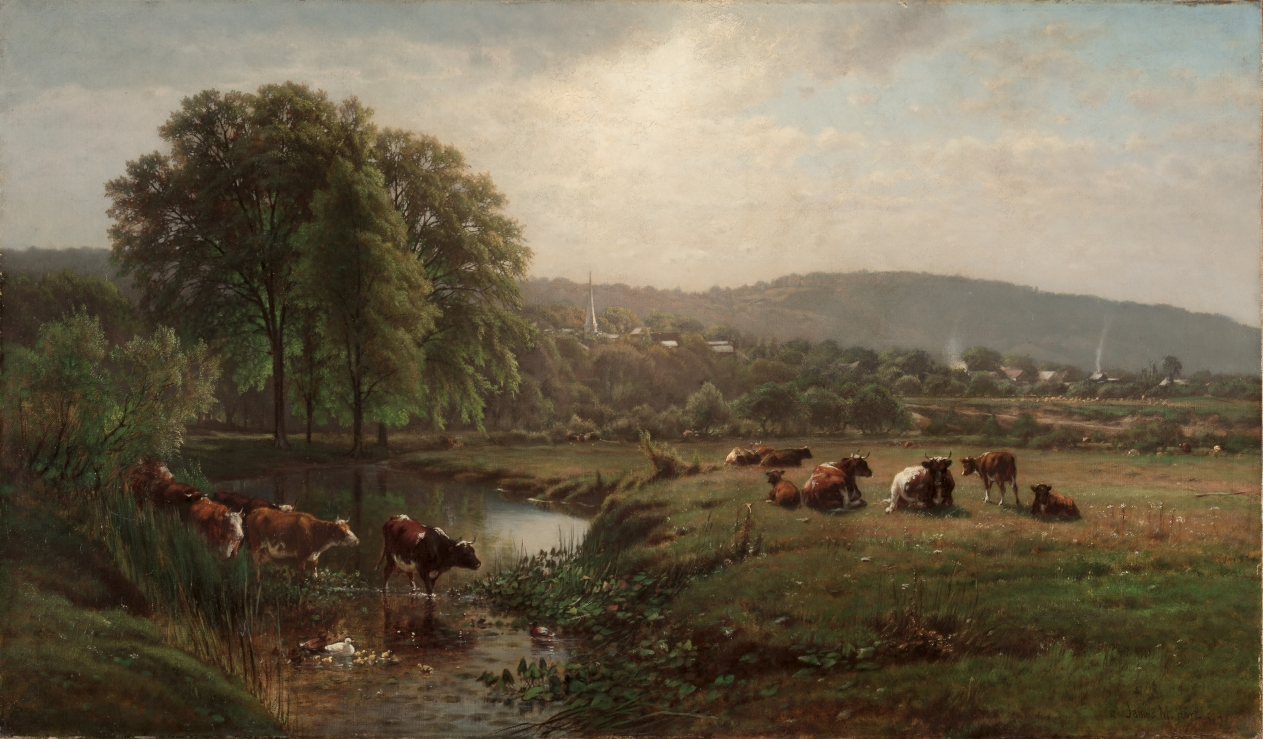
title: Morning in New England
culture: America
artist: James McDougal Hart (American, born Scotland, 1828–1901)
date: 1873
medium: oil on canvas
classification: Painting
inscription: signed lower right: James M. Hart./ 1873.